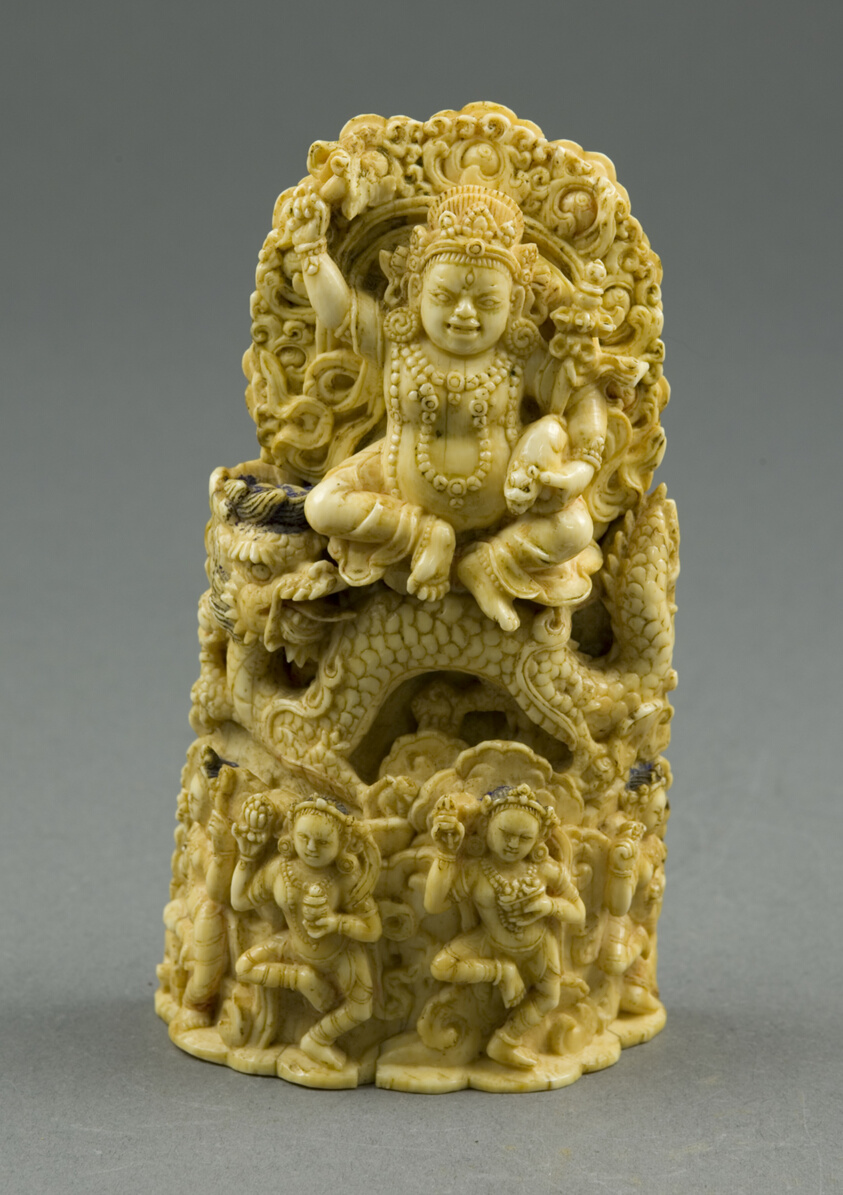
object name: Sculpture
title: Jambhala, the God of Wealth, Seated on a Dragon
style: Himalayan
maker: Eastern Tibet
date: 15th century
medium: Ivory with traces of gilding and pigment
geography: Tibet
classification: ivory; sculpture; asian art